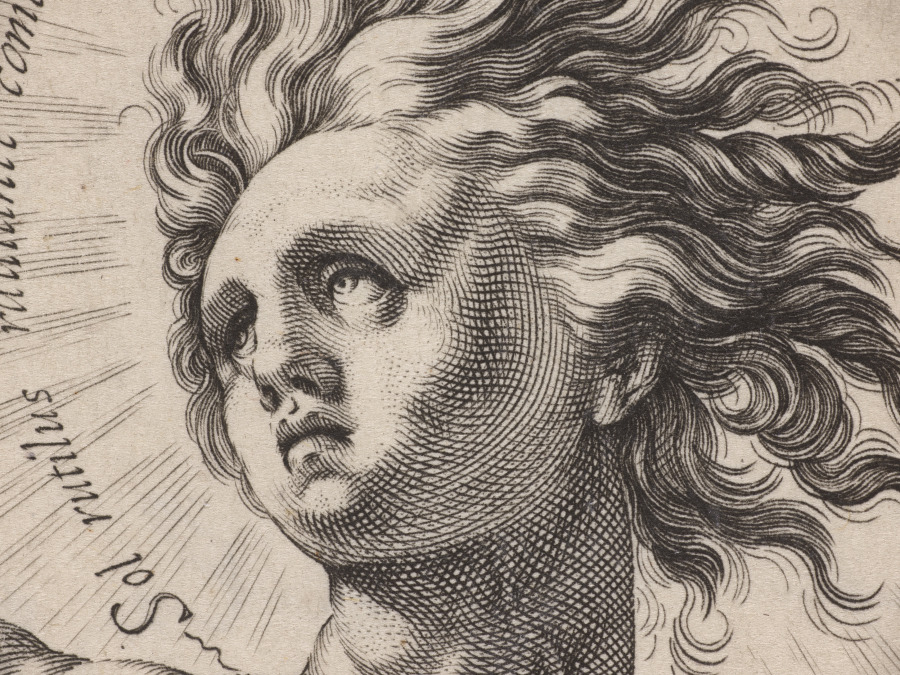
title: Apollo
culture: Netherlands, 16th century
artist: Hendrick Goltzius (Dutch, 1558–1617)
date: 1588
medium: engraving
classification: Print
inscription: upper center, in plate (words form a halo around Apollo's head): Sol rutilus radiante coma, et fulgore corusco / Dispellit tenebras, totumque illuminat orbem ; lower center, in plate: HG.[in monogram] fe. ; lower center, in plate: A°.88. ; VERSO, upper center, in graphite: 38 N°60 ; upper center, in graphite: H. Goltzius ; lower center, in graphite: C3575 7. ; lower center, in graphite: 1-10 ; lower right, in graphite: H 131 ; lower right, in graphite: 12[circled] ; lower left, in graphite: 1C [lt?]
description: This engraving depicts Apollo as the radiant sun god. With fire-like hair, he strides through rolling waves of clouds, while in the background his chariot makes its daily trip across the sky. The Latin text that forms his halo translates: “With its aureole and shining ray, the bright Sun drives away the darkness and lights the whole earth.” Apollo’s excessively muscled body reflects an aspect of Mannerism, a stylistic trend in the mid- to late 1500s that exaggerated natural qualities. By over embellishing Apollo’s musculature, Goltzius transformed an athletic male body into a supernatural one.